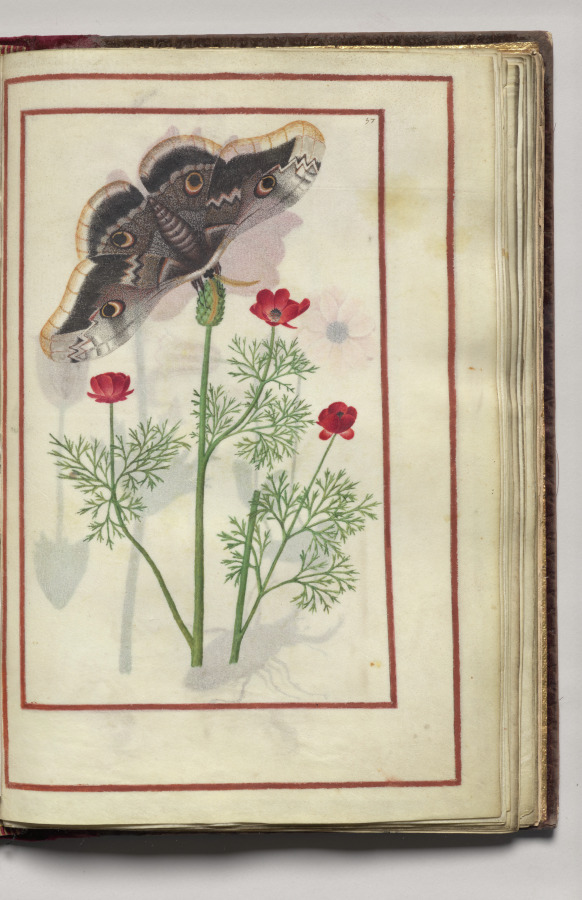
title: Moth with Poppies?, folio 29 (recto), from Florilegium (A Book of Flower Studies)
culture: France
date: 1608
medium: watercolor, ink, silver, and gold over occasional traces of pencil, on vellum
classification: Bound Volume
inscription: Dated: Poitiers 1608 (on frontispiece) Signed: On frontispiece in black ink, lower right: Van Kuyk Notation on drawing: Frontispiece: in pencil, lower margin: * élève de Van Kessel, peintre flammand (* in pencil also appears in front of Van Kuyk's name).